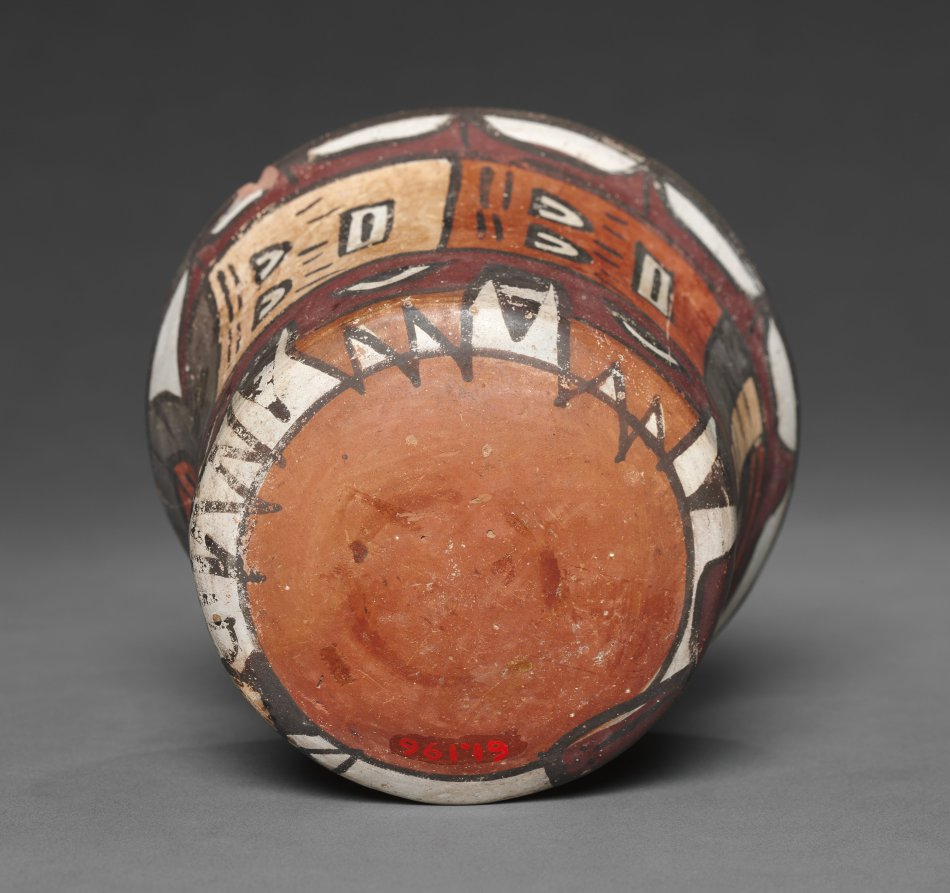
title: Bowl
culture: Peru, South Coast, Nasca, Florescent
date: 100 BCE–700 CE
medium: earthenware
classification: Ceramic